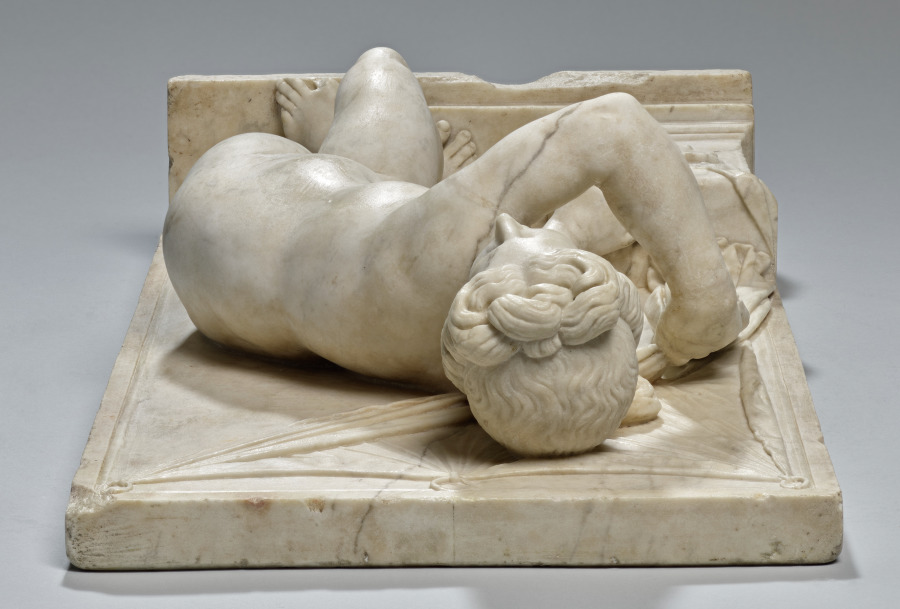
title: Dido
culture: Italy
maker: Aurelio Lombardo (Italian, 1501–1563)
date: c. 1525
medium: marble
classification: Sculpture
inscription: PVNICA SVM [DIDO ERE]XI QVAE MOENIA BYRSA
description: Artists customarily portrayed Dido as a forlorn lover abandoned by the Trojan hero, Aeneas, but here she is a conquering queen. Dido draws aside an oxhide curtain, a reference to the mythical founding of Carthage (in modern-day Tunisia, North Africa), when she was given an oxhide to demarcate granted land. By cutting it into thin strips she was able to encircle the future city. Dido was likely created for display in a studiolo, a place of study featuring refined works of art appreciated by humanist scholars and aficionados during the Renaissance.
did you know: Dido’s nudity and hairstyle are allusions to ancient Greek images of Aphrodite.